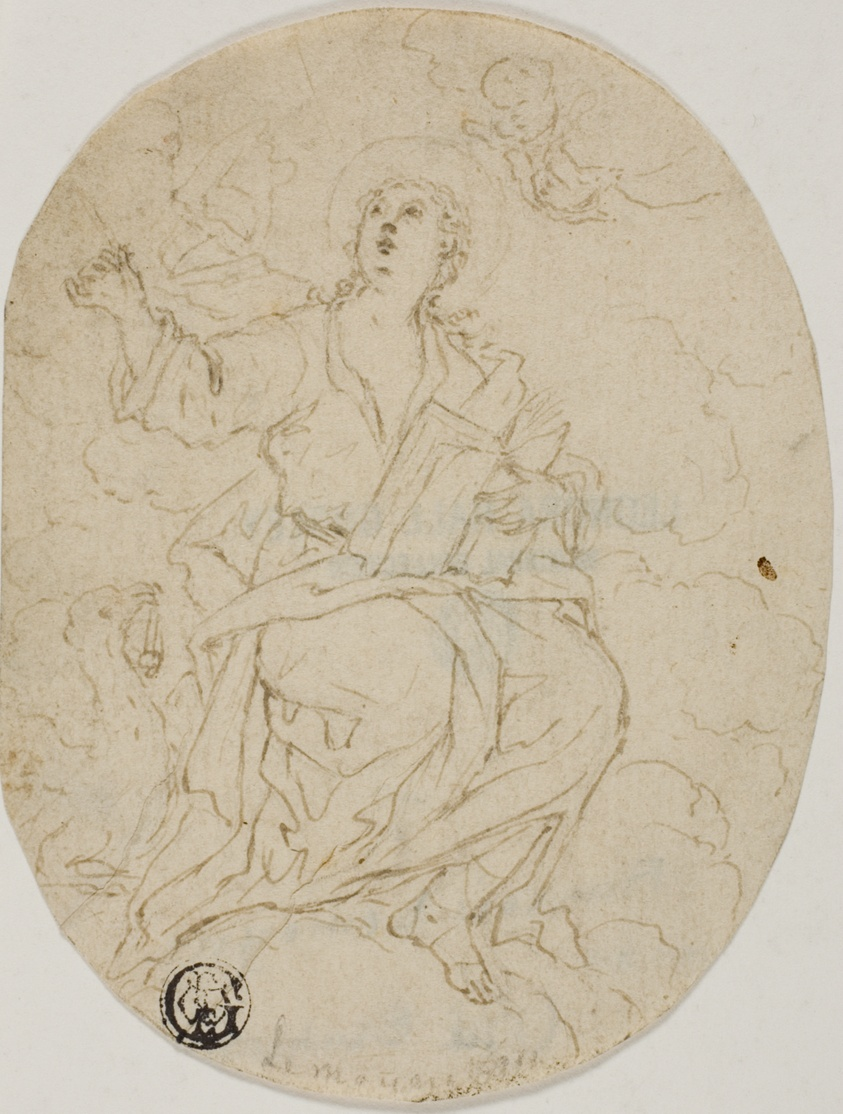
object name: Drawing and Watercolor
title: Saint John the Evangelist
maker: François Lemoyne; French, 1688-1737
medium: Pen and brown ink over black chalk on cream laid paper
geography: France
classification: pen and ink drawings; drawings (visual works); prints and drawing